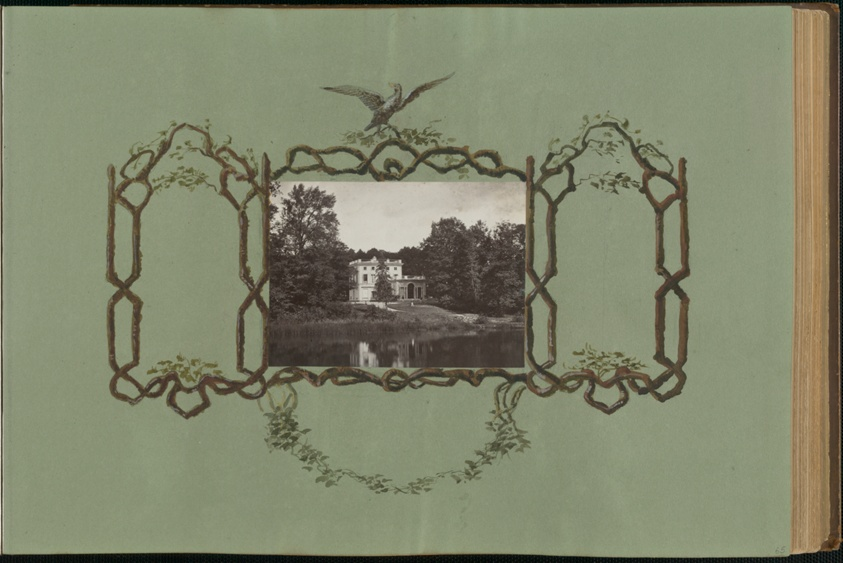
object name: Photograph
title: The Madame B Album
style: 19th century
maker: Marie-Blanche Hennelle Fournier (French, 1831–1906)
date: 1870s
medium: Albumen print with watercolor (in album)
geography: France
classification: photograph; albumen silver print; photography